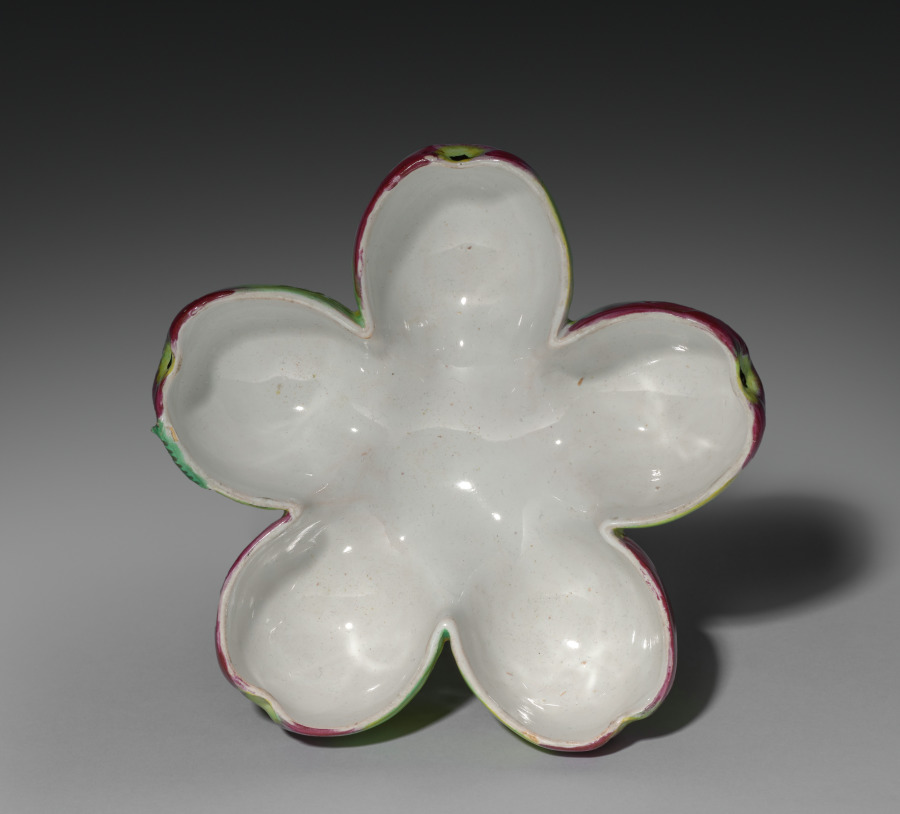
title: Box in the Form of Apples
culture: France, 18th century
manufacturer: Sceaux Factory (French, active 1748–66)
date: c. 1760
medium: Tin- glazed earthenware (faience) wth enamel decoration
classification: Ceramic